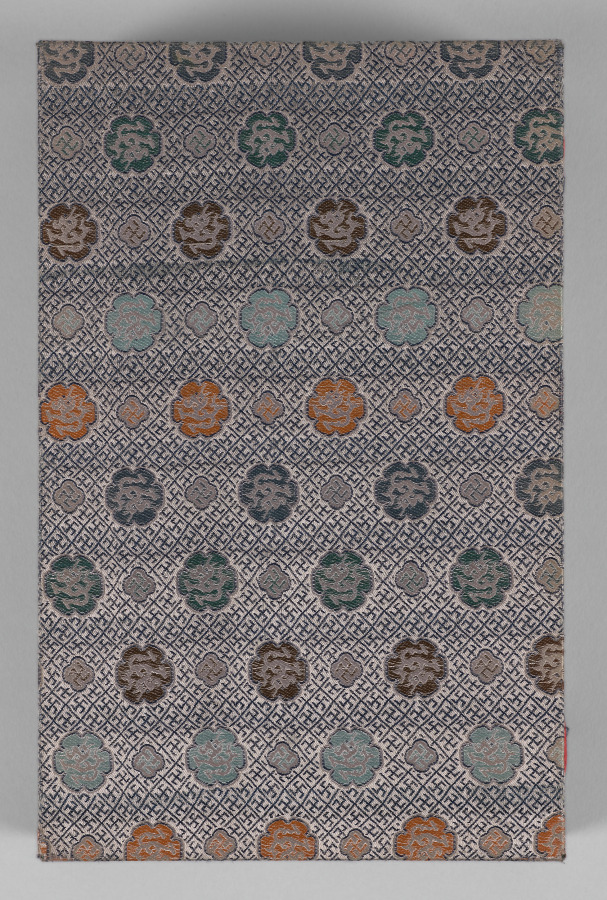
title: Yu-hai (Ocean of Jade) woodblock bound volume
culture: China, Ming dynasty (1368–1644)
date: 1368–1644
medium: woodblock-printed book with painted edges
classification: Bound Volume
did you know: When each book is rolled to form a cylinder, a landscape appears on the edges, painted in ink and washes of color.